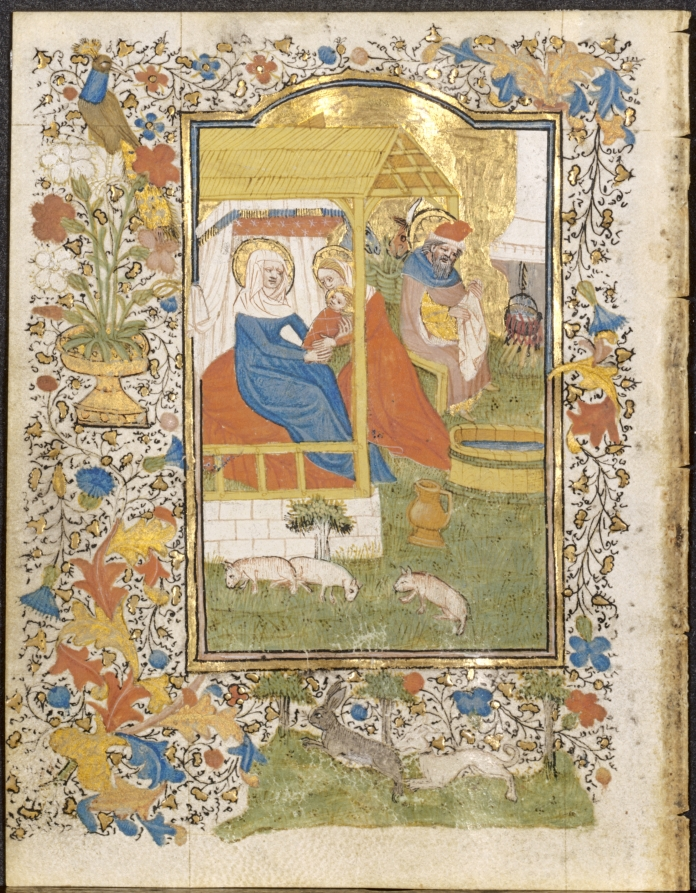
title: The Nativity: Leaf from a Book of Hours (3 of 6 Excised Leaves)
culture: France, Metz, 15th century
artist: Henri d'Orquevaulx (French)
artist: or Workshop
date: c. 1420–30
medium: ink, tempera, and gold on vellum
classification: Manuscript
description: This leaf survives from what must have been an extraordinarily rich book of hours. Stylistically, the illuminations relate to the workshop of Henri d'Orquevaulx, a documented Metz manuscript painter. Little is known about d'Orquevaulx's life or career. Compositionally, structurally, and stylistically, the miniatures suggest strong links to Netherlandish illumination.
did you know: The popularity of books of hours lasted until around the 1550s, when the German priest Martin Luther, in his attempts to reform the Catholic Church, declared them full of “un-Christian tomfoolery,” and they fell out of favor.